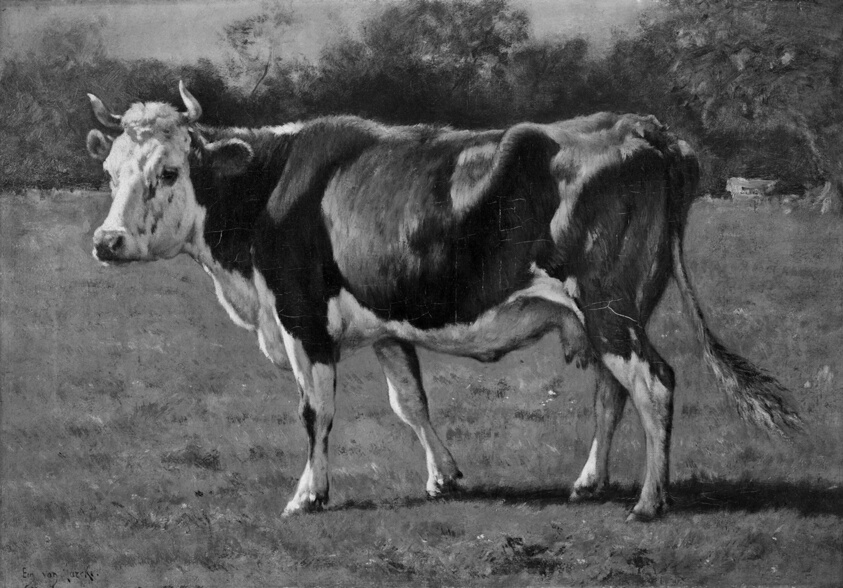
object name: Painting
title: Study of a Cow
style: nineteenth century, 19th century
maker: Emile van Marcke de Lummen (French, 1827–1890)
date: c. 1875–90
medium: Oil on canvas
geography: France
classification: oil on canvas; french; paint; oil paintings (visual works); painting; european painting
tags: cows, trees, pastures, landscape, farm, animals